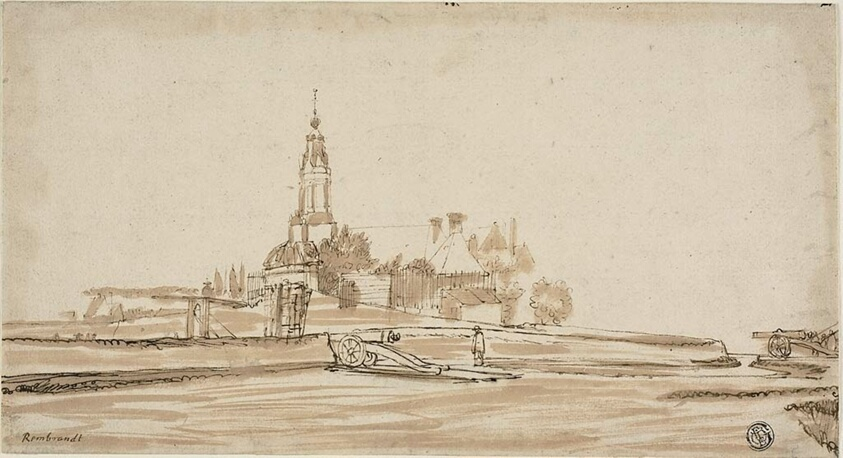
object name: Drawing and Watercolor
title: Haarlem Gate at Amsterdam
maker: Johannes Ruisscher; Dutch, c. 1625-after 1675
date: c. 1650-70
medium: Pen and brown ink, with brush and brown wash on paper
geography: Holland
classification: pen and ink drawings; drawings (visual works); prints and drawing